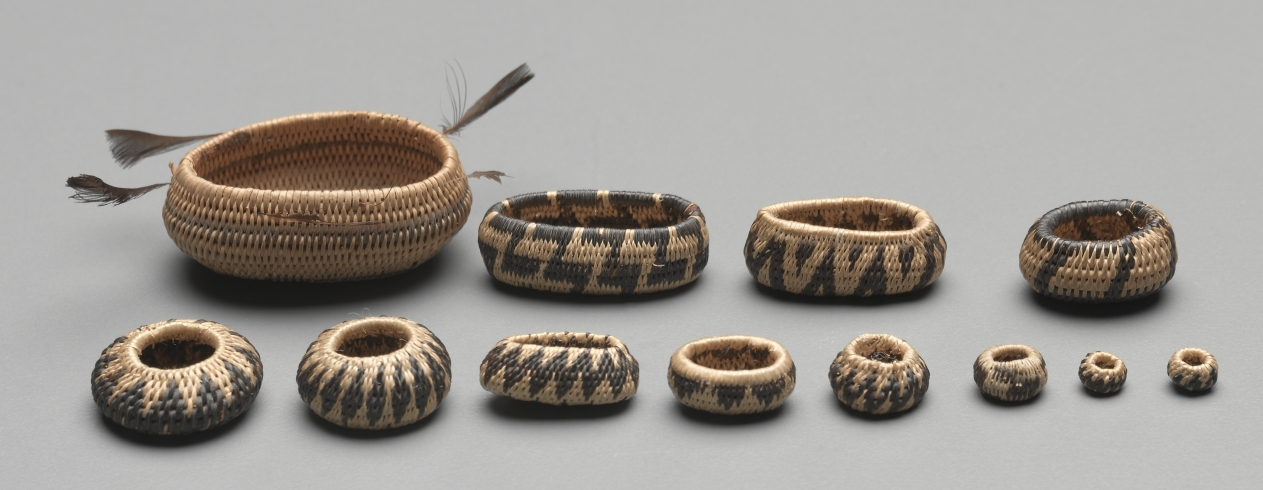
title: Miniature Round Basket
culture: California, Pomo, late 19th-early 20th century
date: late 1800s-early 1900s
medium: plant materials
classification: Basketry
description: Miniature baskets were made to demonstrate the basket-maker’s virtuoso skill, and these tiny marvels seem to be no exception -- the smallest are just a few millimeters wide but still patterned. For such fine work, dexterity was required as much for preparation of materials as for weaving.